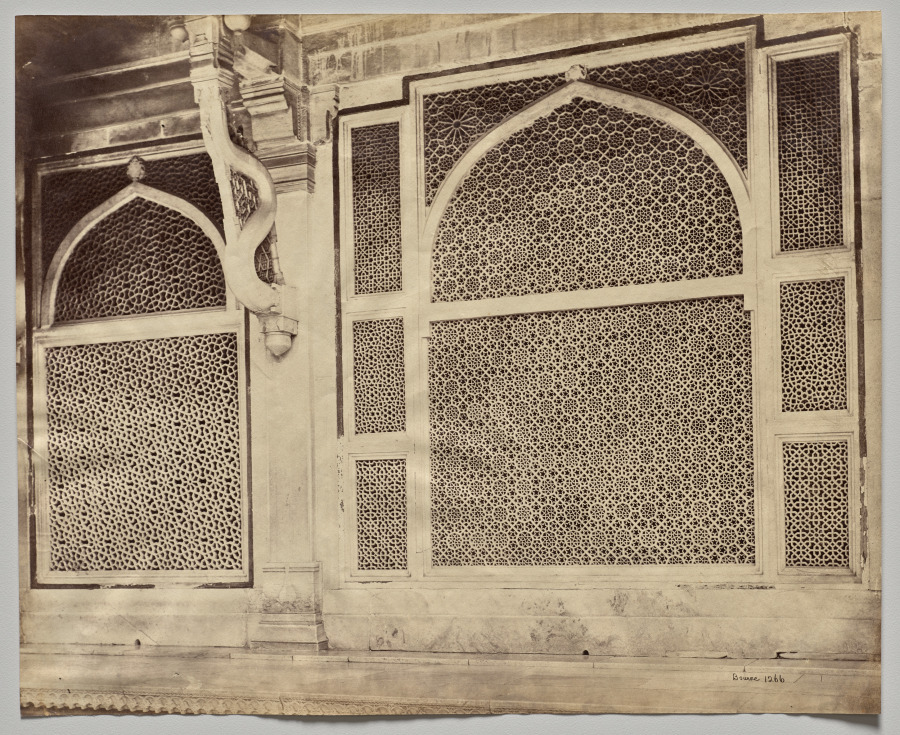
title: Futtypore Sikri—Two of the Marbled Screens in the Tomb of Sheik Selim Chisti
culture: India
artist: Samuel Bourne (British, 1834–1912)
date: 1866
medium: albumen print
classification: Photograph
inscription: Inscription at bottom right: "Bourne 1266"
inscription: Embossed mark at center right edge corresponding to “watermark” on the left edge of verso, RJK Ri… No 72 (?).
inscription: Graphite inscription on verso: "1266"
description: These elaborate screens decorate the mausoleum of the Sufi saint Salim Chisti (1478-1572). The building, considered one of the finest examples of Mughal architecture in India, was built in 1580-1581 by the Emperor Akbar to honor the saint, whose prayers he believed had guaranteed the birth of male heirs to the throne.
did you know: Carved marble screens provided not just decoration but also light and air to interiors, while keeping out sun glare and prying eyes.